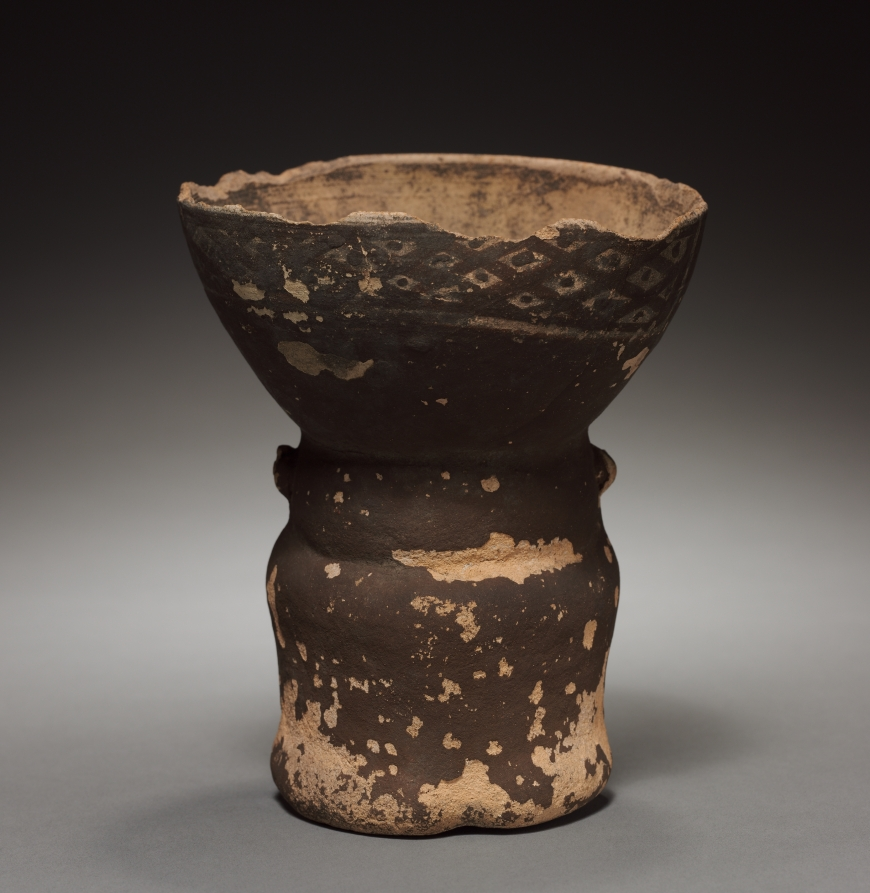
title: Bottle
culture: Peru, Pachacamac, 9th-12th Century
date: 800–1150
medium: pottery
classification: Ceramic